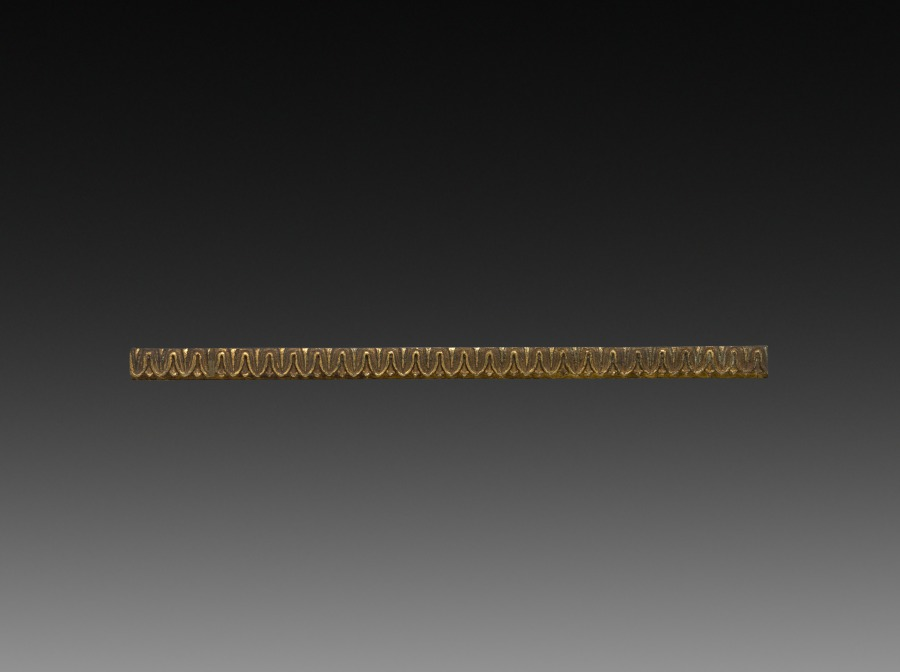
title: Ornamental Detail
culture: France, late 18th century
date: late 1700s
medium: gilt bronze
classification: Metalwork